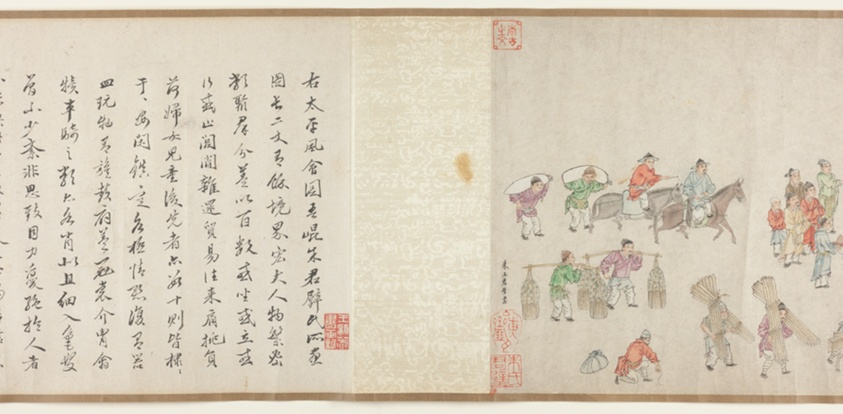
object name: Painting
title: Street Scenes in Times of Peace 太平風會圖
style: Chinese (culture or style)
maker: Zhu Yu (Zhu Junbi) 朱玉（朱君璧）; Chinese, 1293-1365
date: Yuan dynasty (1279–1368), 14th century 元朝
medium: Handscroll; ink and colors on paper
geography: China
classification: handscroll; painting; asian art